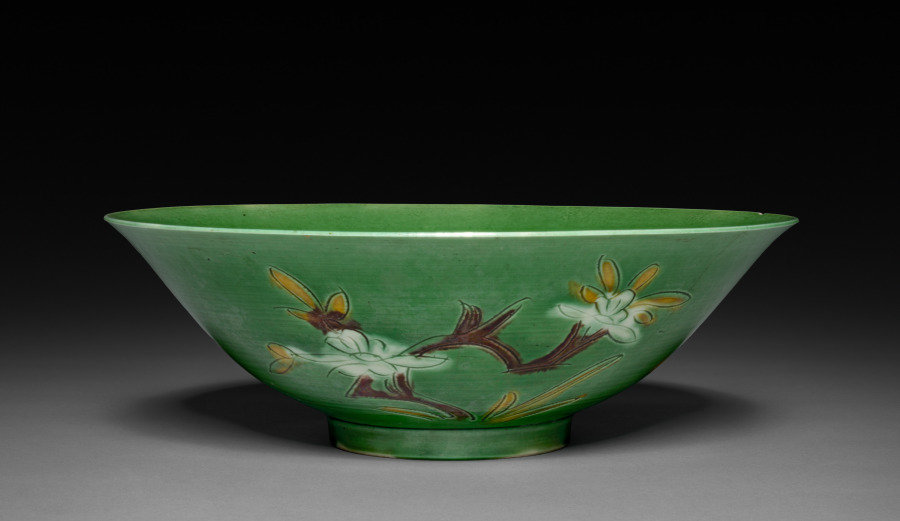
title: Bowl with Sprays of Flowers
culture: China, Jiangxi province, Jingdezhen kilns, Qing dynasty (1644-1911), Kangxi reign (1662-1722)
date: 1662–1722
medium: porcelain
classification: Ceramic